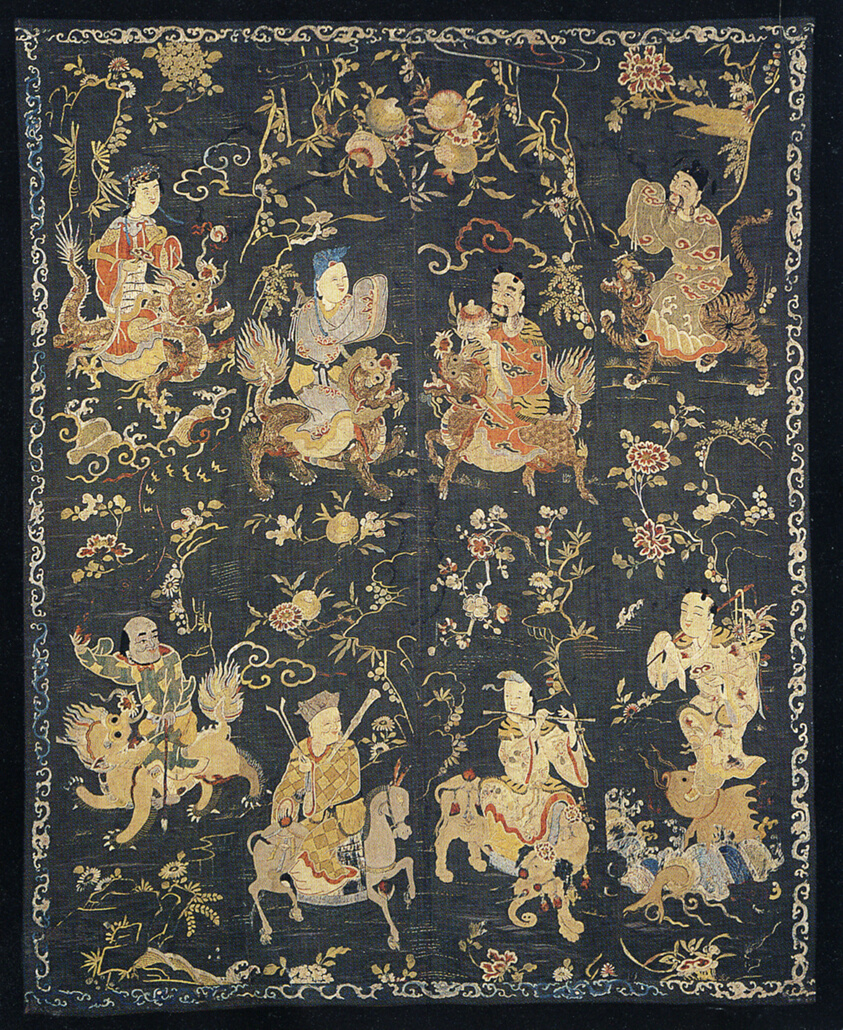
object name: Textile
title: Panel (Furnishing Fabric)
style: qing, Chinese (culture or style), East Asian, asian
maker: China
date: Qing dynasty (1644–1911), 1820/30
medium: Silk, warp-float faced 4:1 satin weave; embroidered with silk and gold-leaf-over-lacquered-paper-strip-wrapped silk in flat, knot, satin, padded satin, surface satin, split, and stem stitches; laid work and couching; four panels joined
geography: China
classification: textile; needlework (visual works); weaving; furnishing textile